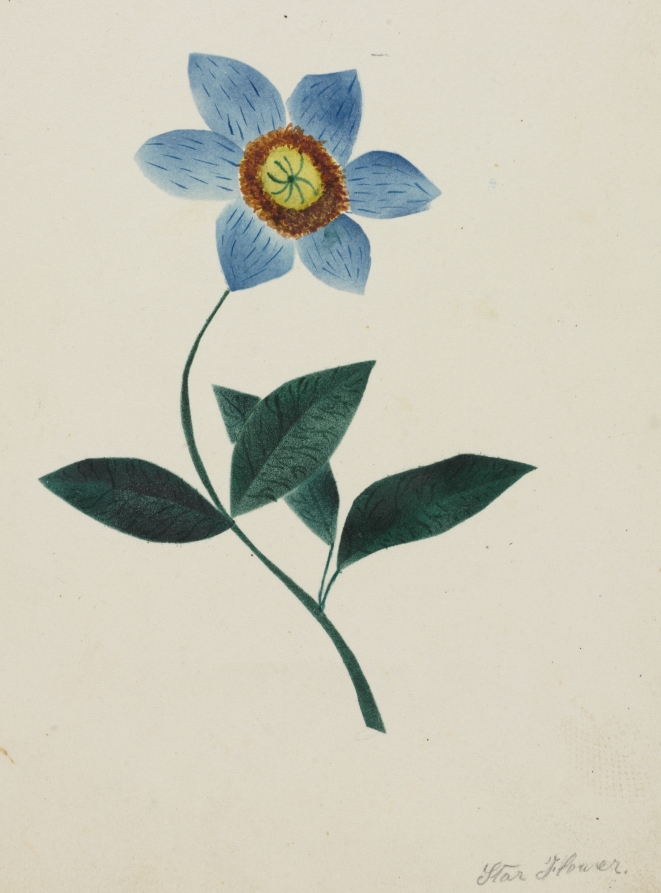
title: Star Flower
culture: America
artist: Mary Altha Nims (American, 1817–1907)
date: 1800s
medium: watercolor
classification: Drawing